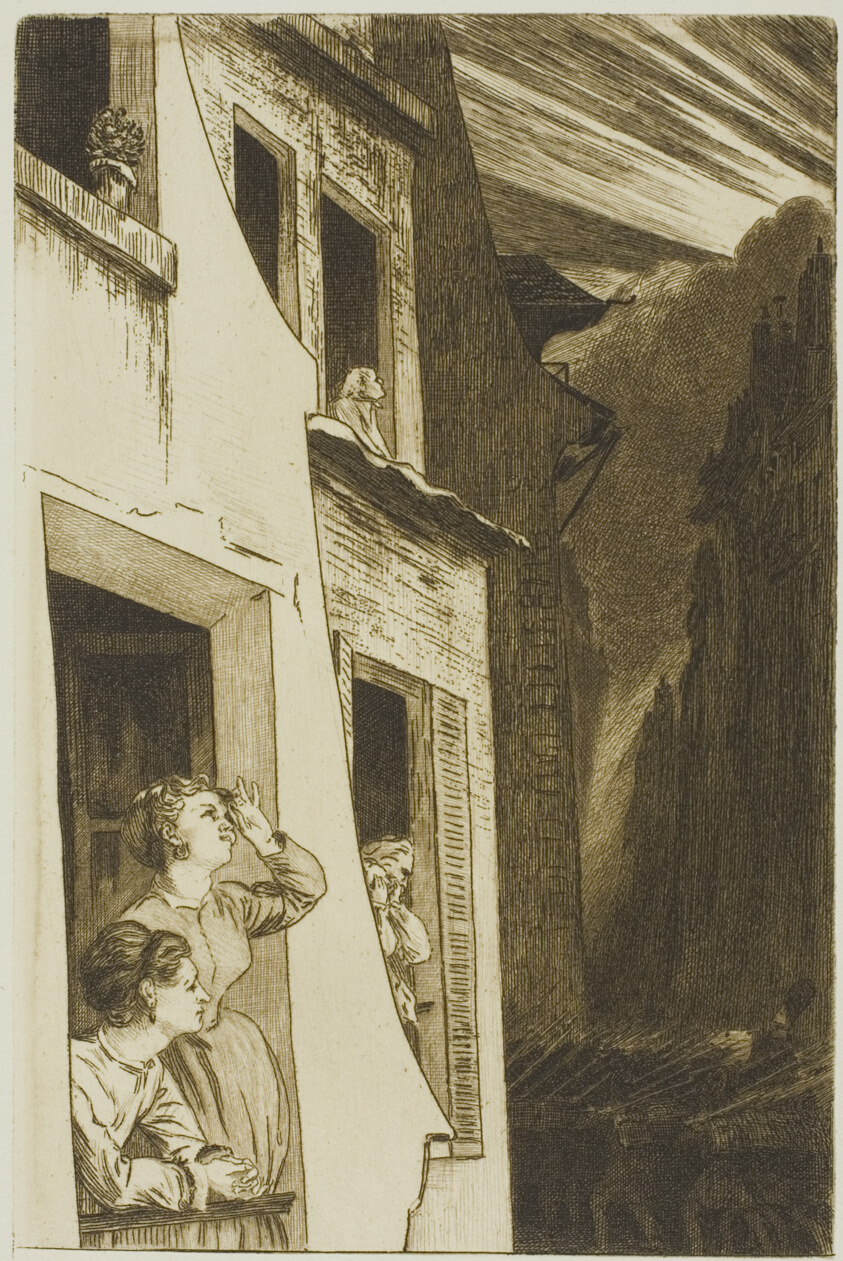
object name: Print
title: The Eclipse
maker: Felix Bracquemond; French, 1833–1914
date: 1869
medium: Etching in brown on cream wove paper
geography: France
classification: etching; print; prints and drawing